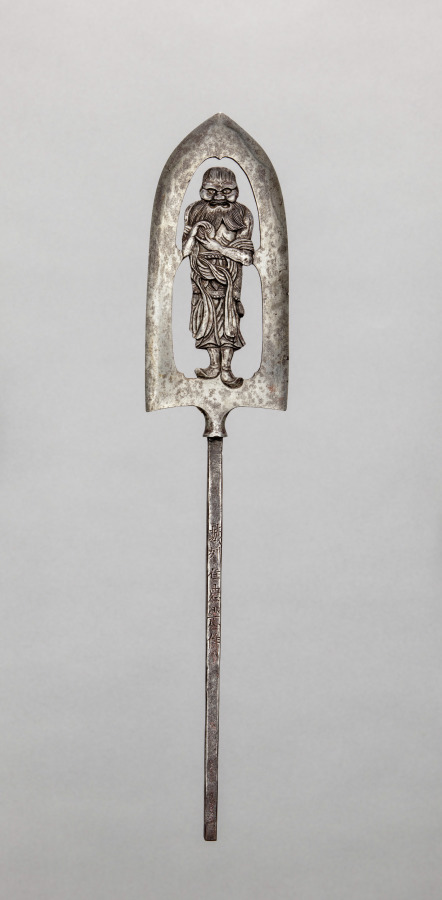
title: Ceremonial Arrowhead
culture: Japan, Edo period (1615–1868)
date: 1668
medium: Steel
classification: Arms and Armor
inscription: front: 城州住忠光作, back: 寛文八年十月日